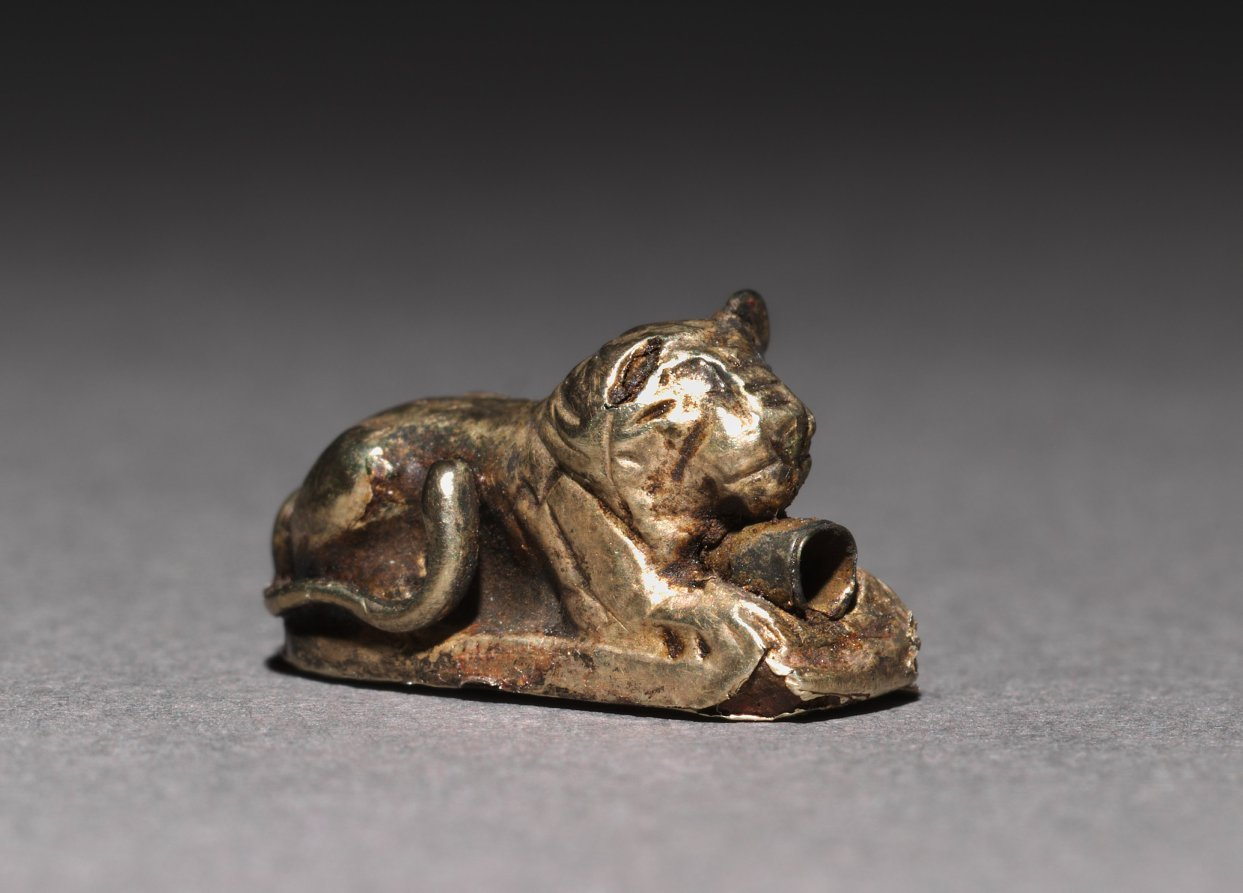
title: Recumbent Lion Bead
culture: Egypt, Middle Kingdom (2040–1648 BCE), Dynasty 12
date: 1980–1801 BCE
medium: electrum over a clay-bulked resin core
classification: Amulets